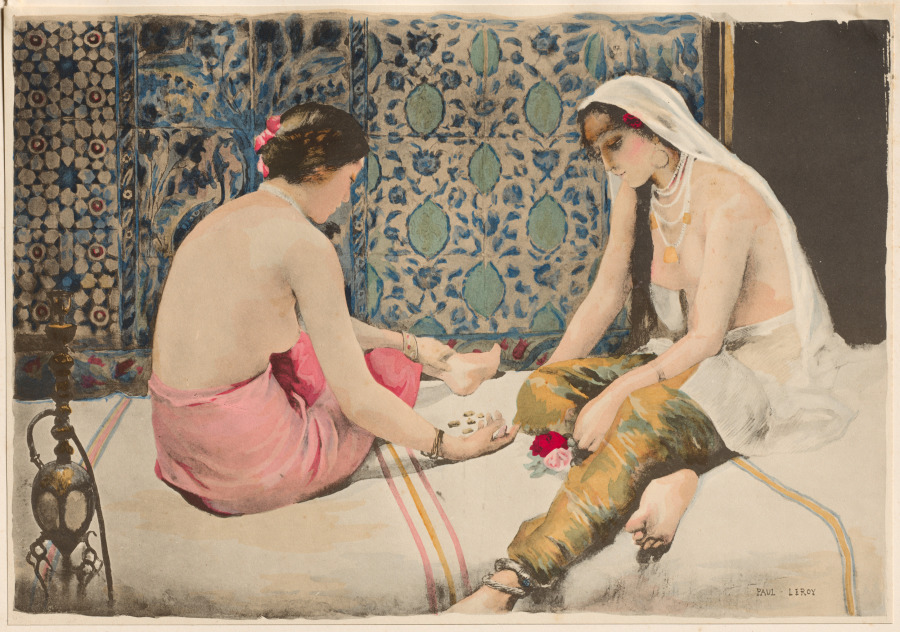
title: Joueuses d'Osselets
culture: France, Paris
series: L'Estampe Moderne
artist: Paul Alexandre Alfred Leroy (French, 1860–1942)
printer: Imprimerie Champenois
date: 1899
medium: Color lithograph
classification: Bound Volume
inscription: In plate: lower right corner of image: PAUL - LEROY; upper right corner of secondary support: blindstamp of l'Estampe Moderne (Lugt 2790)